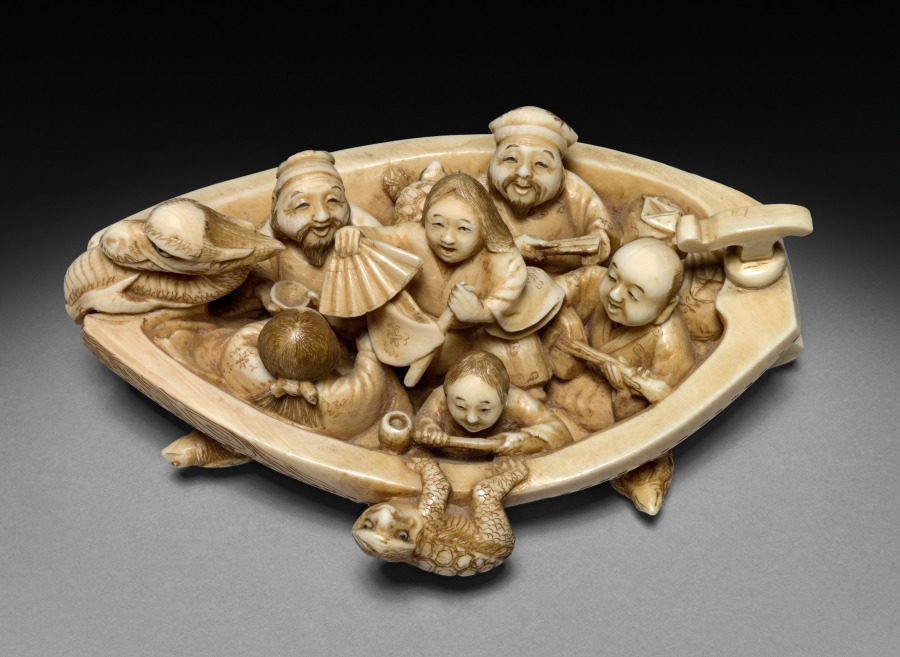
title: Boat with Six Passengers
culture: Japan, Edo period (1615–1868) to Meiji period (1868–1912)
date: c 1800s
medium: ivory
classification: Netsuke